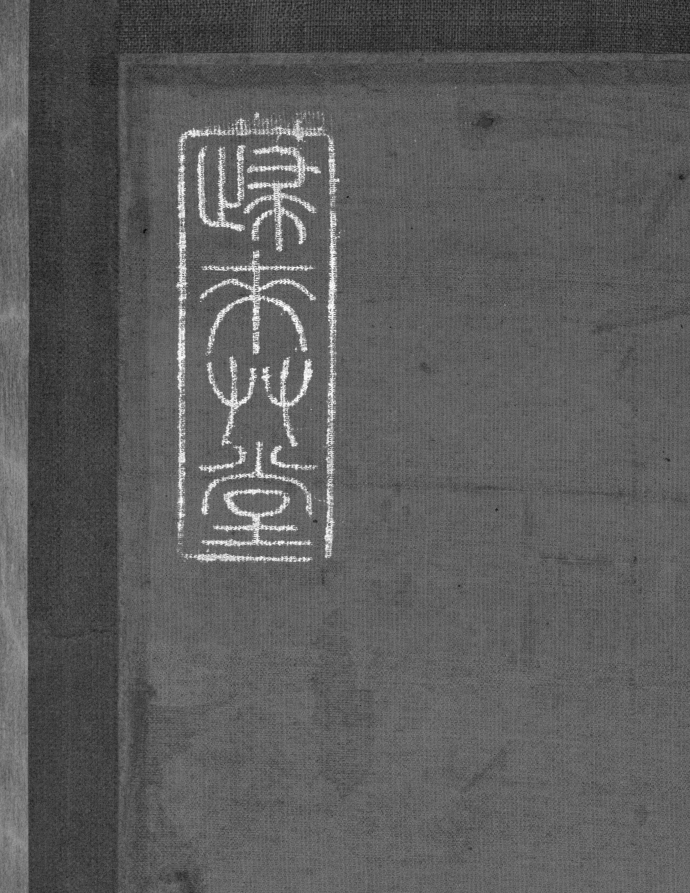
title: Xu Jingyang Moving His Family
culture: China, Ming dynasty (1368–1644)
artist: Cui Zizhong (Chinese, 1574–1644)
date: 1644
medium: Hanging scroll; ink and color on silk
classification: Painting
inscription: Artist's 2 seals: Pei-hai, Cui Zizhong yin.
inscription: 9 additional seals: 2 of Xiang Yuan (18th-19th c.); 1 of Tang Zuomei (late 18th-19th c.); 1 of Zhang Heng 張珩 (1915-1963); 1 of C. C. Wang 王季遷 (1907–2003); 4 unidentified.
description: Xu Jingyang was a dedicated fourth-century Confucian official who allegedly turned into a Daoist immortal. This scroll depicts the legend that when he attained immortality, he took his entire household, including chickens and dogs, to paradise. Cui Zizhong’s painting style intentionally referenced ancient masters. Typical of the pre-Song dynasty landscape tradition, there is the use of blue and green colors and an emphasis on outline rather than texture. While the trembling outlines are reminiscent of earlier painters, the flickering light on rocks and trees is a stylistic feature of Cui’s own time.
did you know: Xu Jingyang, wearing red, is in the upper register of figures, while below his servants transport a rooster, dog, and other supplies.